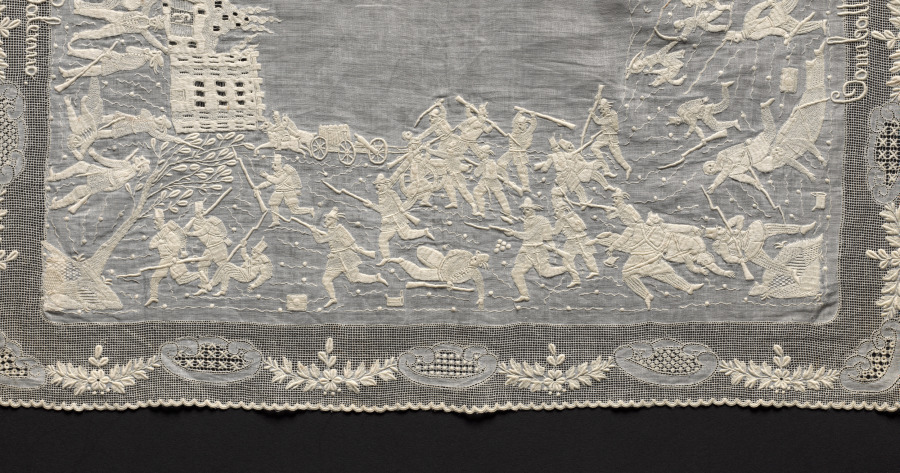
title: Lace Handkerchief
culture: Italy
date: 1850–99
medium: Plain weave cotton (est.): needle lace (cutwork and drawnwork) and embroidery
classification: Embroidery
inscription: on one side: "Combattimento di Calatafimi" and on the other: "L'eroe Garibaldi in Palermo."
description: The embroidery on this handkerchief depicts the Battle of Calatafini in 1860 and the hero Garibaldi in Palermo. The inscription reads: Combattimento di Calatafini" and L'erce Garibaldi in Palermo."